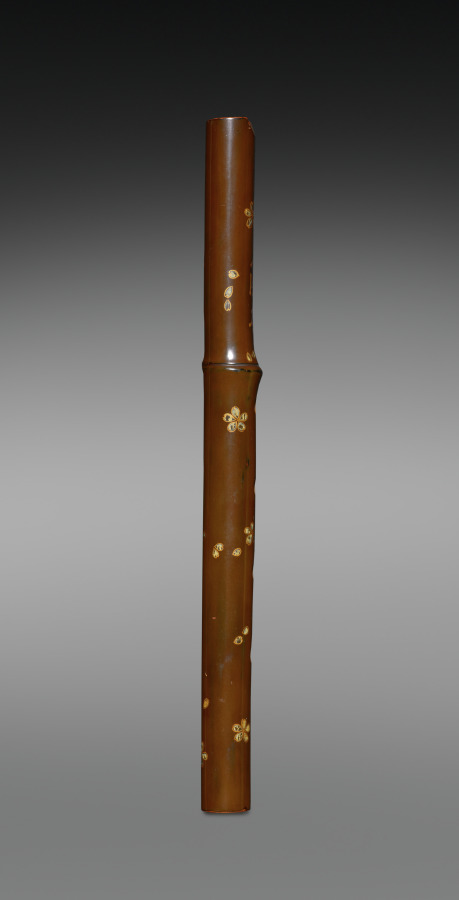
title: End-blown Flute (Hitoyogiri)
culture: Japan, Meiji period (1868–1912)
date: late 1800s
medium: Lacquered bamboo with gold and silver maki-e (sprinkled powder designs)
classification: Musical Instrument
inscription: 篠本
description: The hitoyogiri 一節切 is considered one type of shakuhachi 尺八 bamboo flute and was popular in the 16th and 17th centuries. It is smaller and of weaker sound than the better known fuke 普化, and was thus known as a "small bamboo" or kotake 小竹, during a brief 19th-century revival. The node of the bamboo is positioned between the four finger holes on the front, and the thumb hole at the top of the back. This one has a design of cherry blossoms and scattered petals.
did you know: The name of this flute, hitoyogiri 一節切 comes from the fact that it has a single node in the bamboo from which it is made.